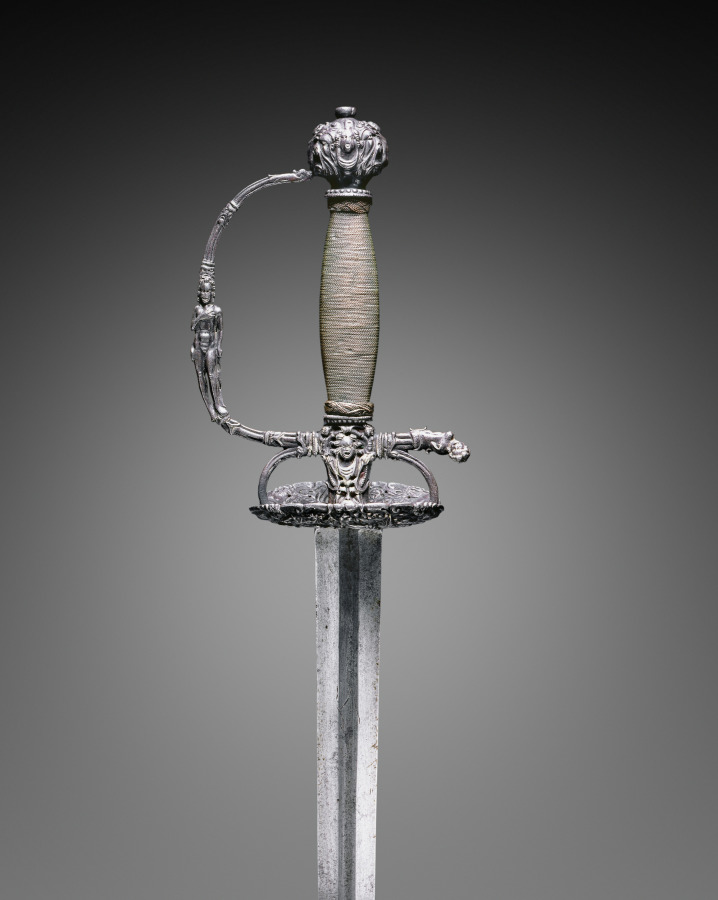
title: Small Sword with Masks and Figures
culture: hilt: Holland, blade: Germany, Solingen, 17th century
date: c. 1660–80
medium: steel; chiseling; copper wire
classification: Arms and Armor